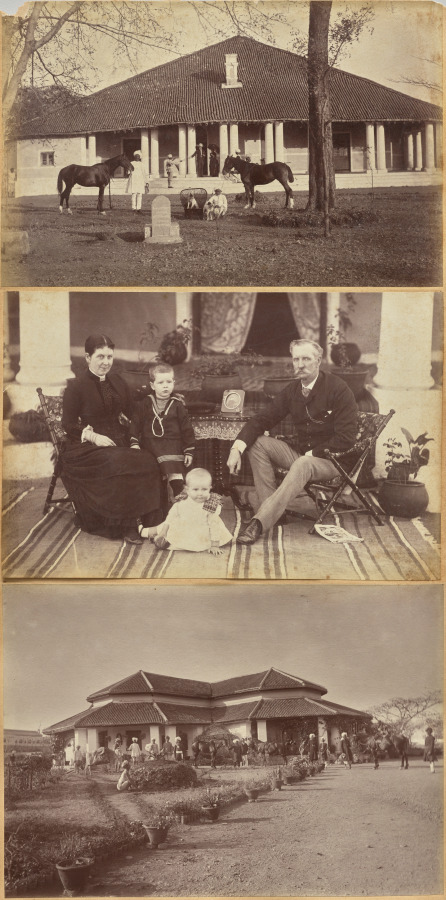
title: Captain Falkner's Bungalow, Neemuch (recto, top); Col. Carpendale and family, Neemuch (recto, bottom); Major Creagh's home, Mhon (verso)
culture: India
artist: Raja Deen Dayal (Indian, 1844–1905)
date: c. 1882–87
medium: albumen print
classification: Photograph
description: These photographs are part of an album, now disassembled, of around 105 photographs taken in India between 1885 and summer 1887 that provide glimpses into the lives of the British colonial elite and royal and upper-class Indians. The museum holds another group of 37 pictures from this album (2016.266), which was probably commissioned by a British civil servant visiting or working in India around 1888 as a personal souvenir of his experiences there.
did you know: Raja Deen Dayal is regarded now, and was considered during his lifetime, to be India’s most important 19th-century photographer.